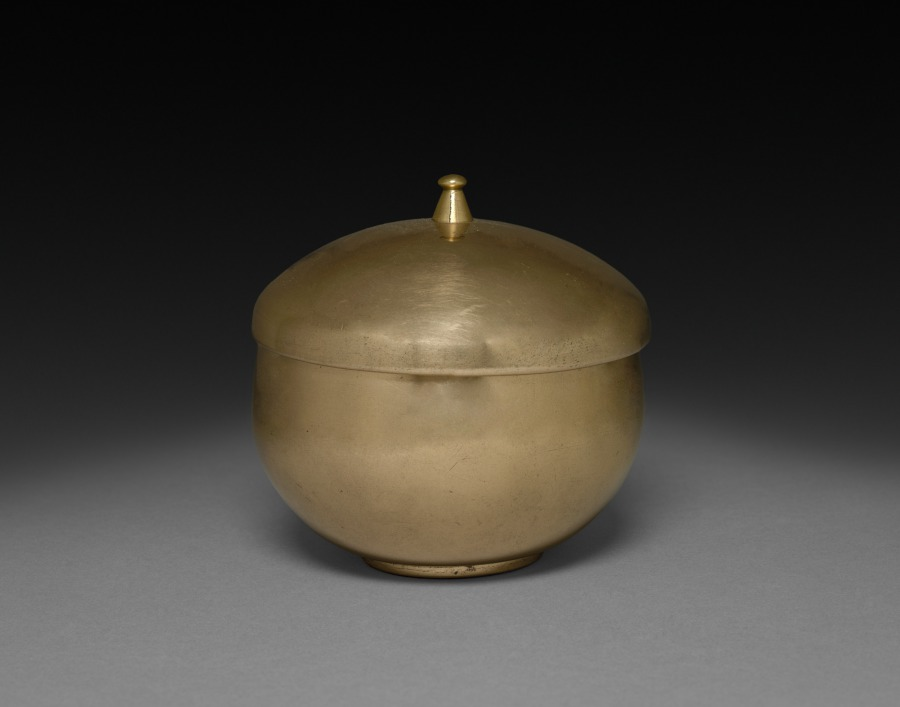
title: Container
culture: Japan, Meiji period (1868–1912) to Taishō period (1912–26)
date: early 1900s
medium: brass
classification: Metalwork